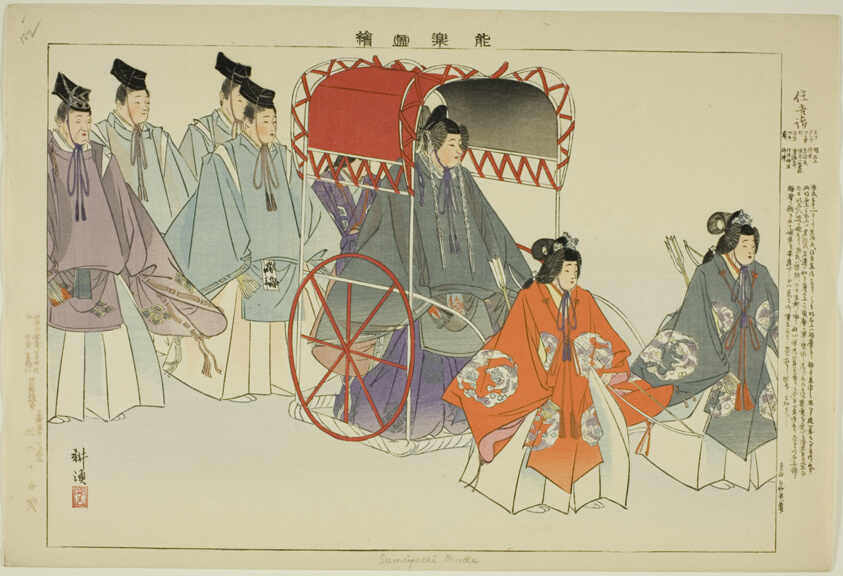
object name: Print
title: Sumiyoshi Mode, from the series "Pictures of No Performances (Nogaku Zue)"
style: Japanese (culture or style)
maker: Tsukioka Kogyo; Japanese, 1869-1927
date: 1898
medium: Color woodblock print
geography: Japan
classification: woodblock print; print; asian art